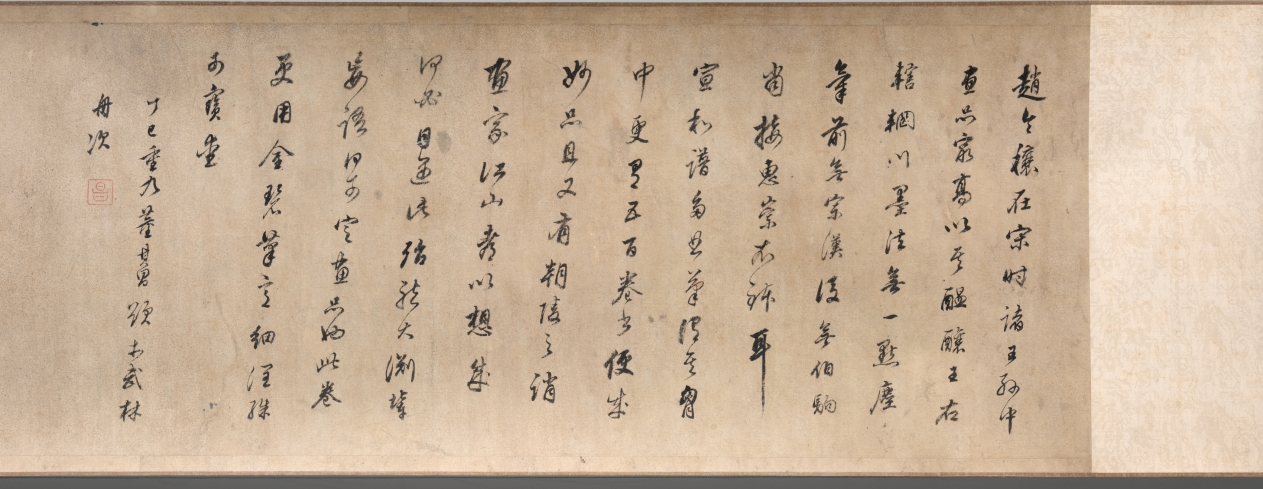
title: Landscape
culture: China, Ming dynasty (1368–1644)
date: 1368– 1644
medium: handscroll; ink and slight color on silk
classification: Painting